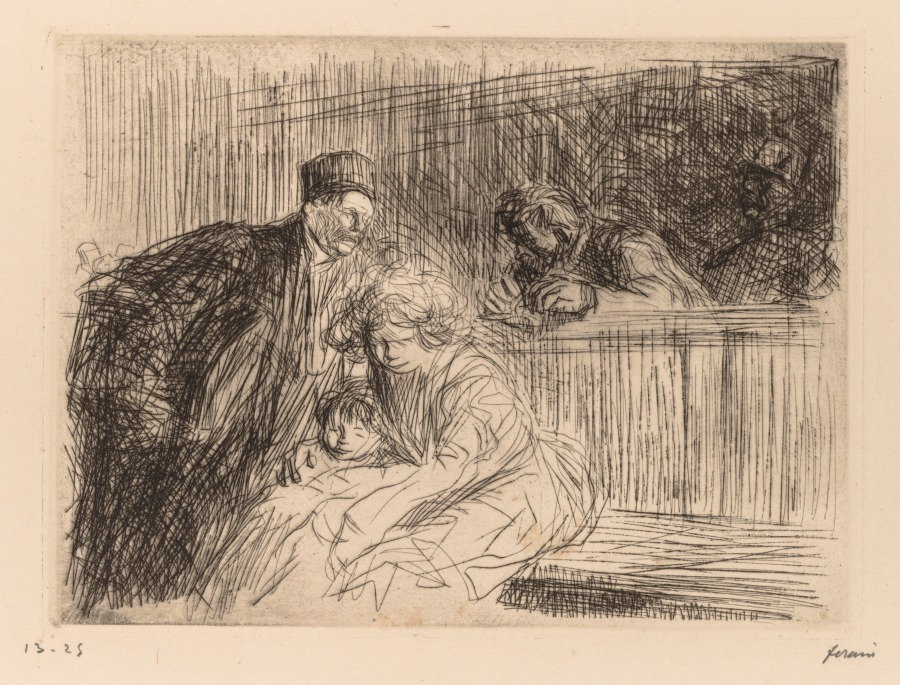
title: L'Avocat Parlant au prevenu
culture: France, 19th-20th century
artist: Jean Louis Forain (French, 1852–1931)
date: 1909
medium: etching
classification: Print